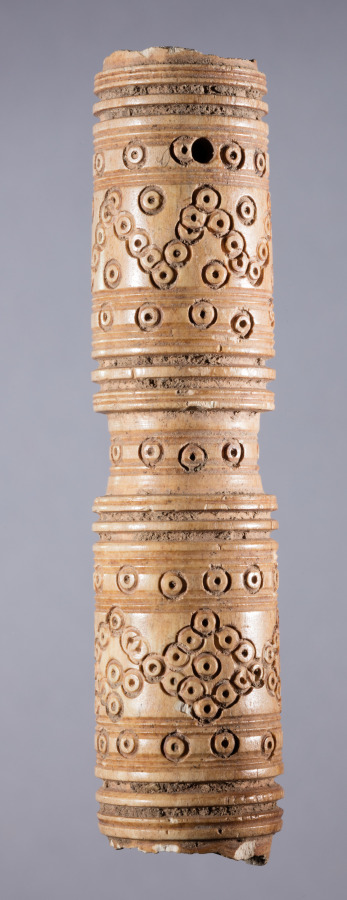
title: Hollow Tube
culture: Iran, early Islamic period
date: 700s - 900s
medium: bone, incised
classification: Miscellaneous